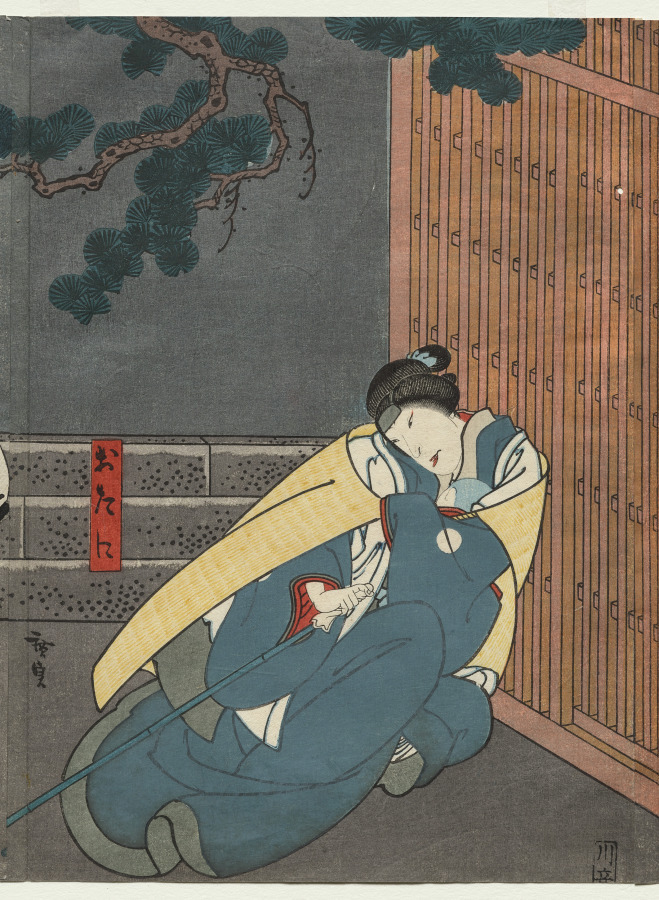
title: Nakayama Nanshi II as Otani (From the series A Tale of Valor at Iga Pass)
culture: Japan, Edo period (1615–1868)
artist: Gosōtei Hirosada (Japanese)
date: c. 1850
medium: color woodblock print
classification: Print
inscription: Signature: Hirosada